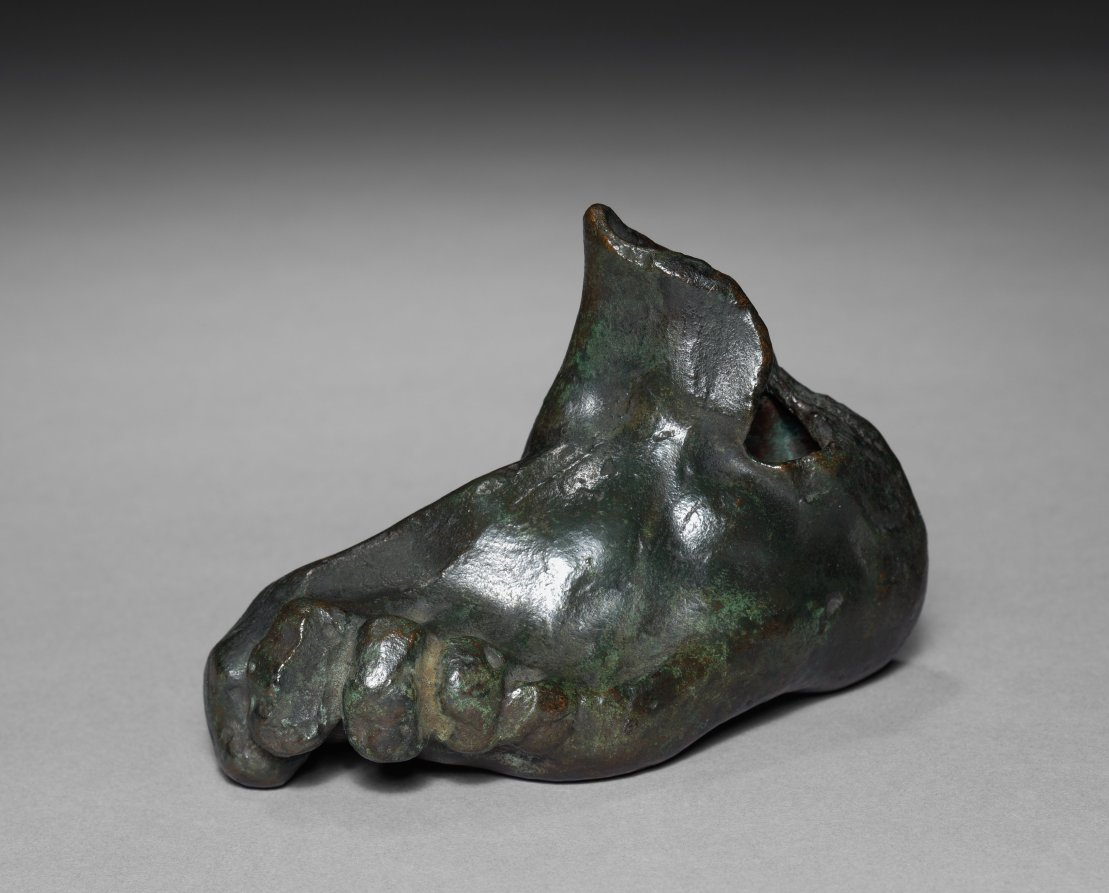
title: Model of a Foot (left foot)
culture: France, late 19th-early 20th Century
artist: Auguste Rodin (French, 1840–1917)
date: c. 1880 – 1917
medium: bronze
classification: Sculpture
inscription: Signed: "A. Rodin"